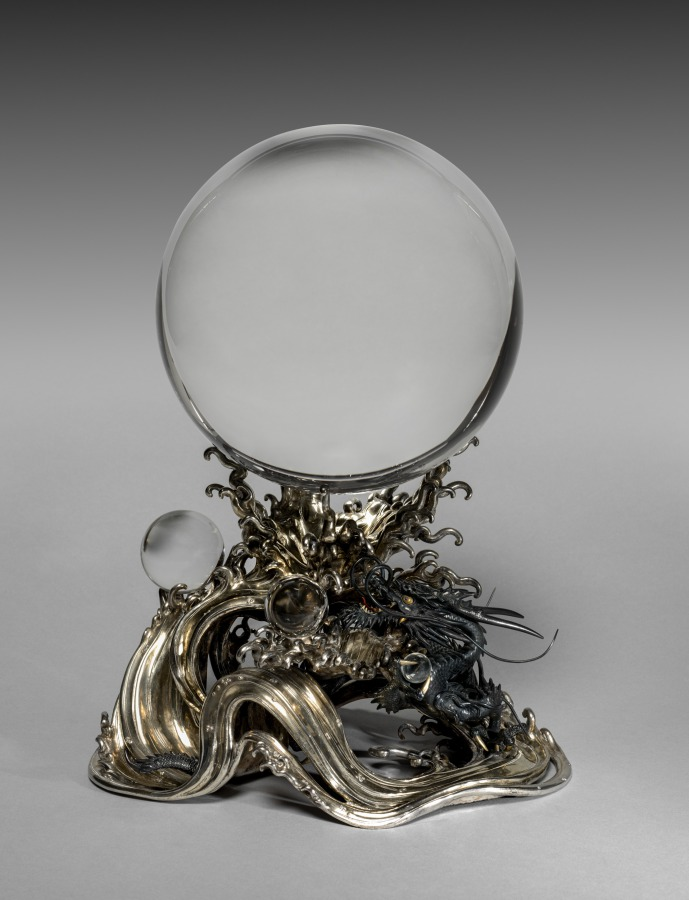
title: Tide-Changing Jewel with Dragon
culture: Japan, Meiji period (1868–1912)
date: early 1900s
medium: silver, shakudō (copper and gold alloy), and crystal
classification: Metalwork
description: An early Japanese legend describes a god of the sea who possesses two jewels responsible for controlling the ebb and flow of the tides. In other legends, the jewels belong to the Dragon King who rules from a palace beyond or beneath the sea. Tales received from China feature dragons that can generate rain by using pearls. This okimono (a small sculptural object without a function) mines imagery associated with these tales while aiming to appeal to the interest in gems and minerals embraced by some Americans and Europeans of the late 1800s and early 1900s.